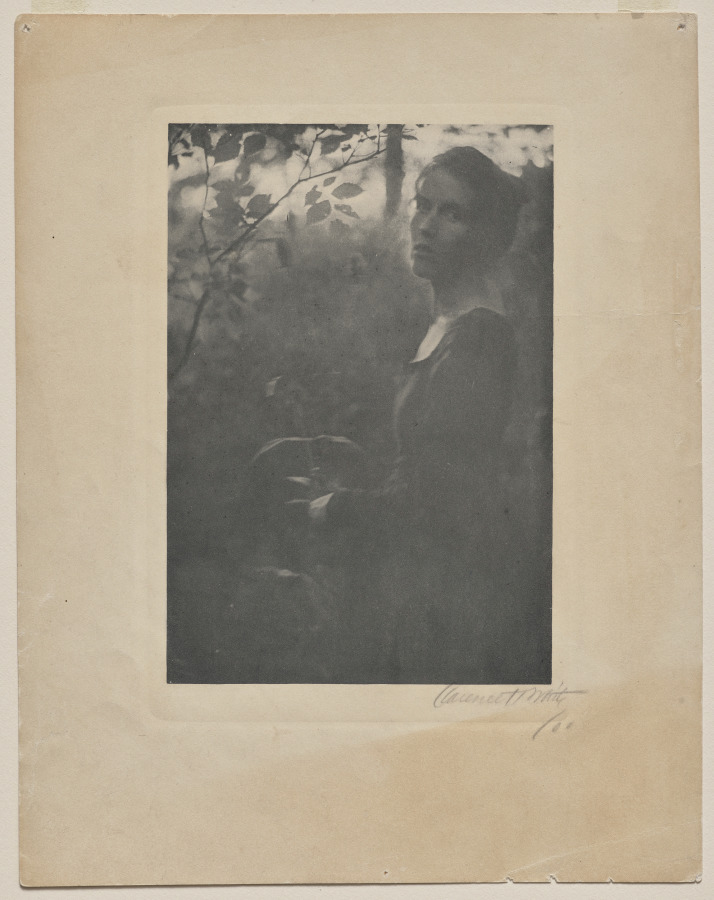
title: The Edge of the Wood - Evening (Letitia Felix)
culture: America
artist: Clarence H. White (American, 1871–1925)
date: 1900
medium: photogravure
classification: Photograph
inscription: Written in pencil on recto: "Clarence H. White [signed] '00"; in pencil on verso: " 'The Edge of the Wood-Evening'- / Clarence H. White"; in pen on verso: "Letitia Felix"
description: Clarence H. White experimented with an array of artistic media that blurred the lines between photography, drawing, and printmaking. Here are two examples of that experimentation: a platinum print on the left and a photogravure on the right. White was likely drawn to both processes for their broad tonal range and interaction of image and paper. To create platinum prints, a light-sensitive liquid emulsion is applied to and absorbed by the paper. The image forms within the paper’s fibers, resulting in a matte appearance. Because photogravures are printed like an etching, the image is formed with ink impressed onto the paper’s surface.